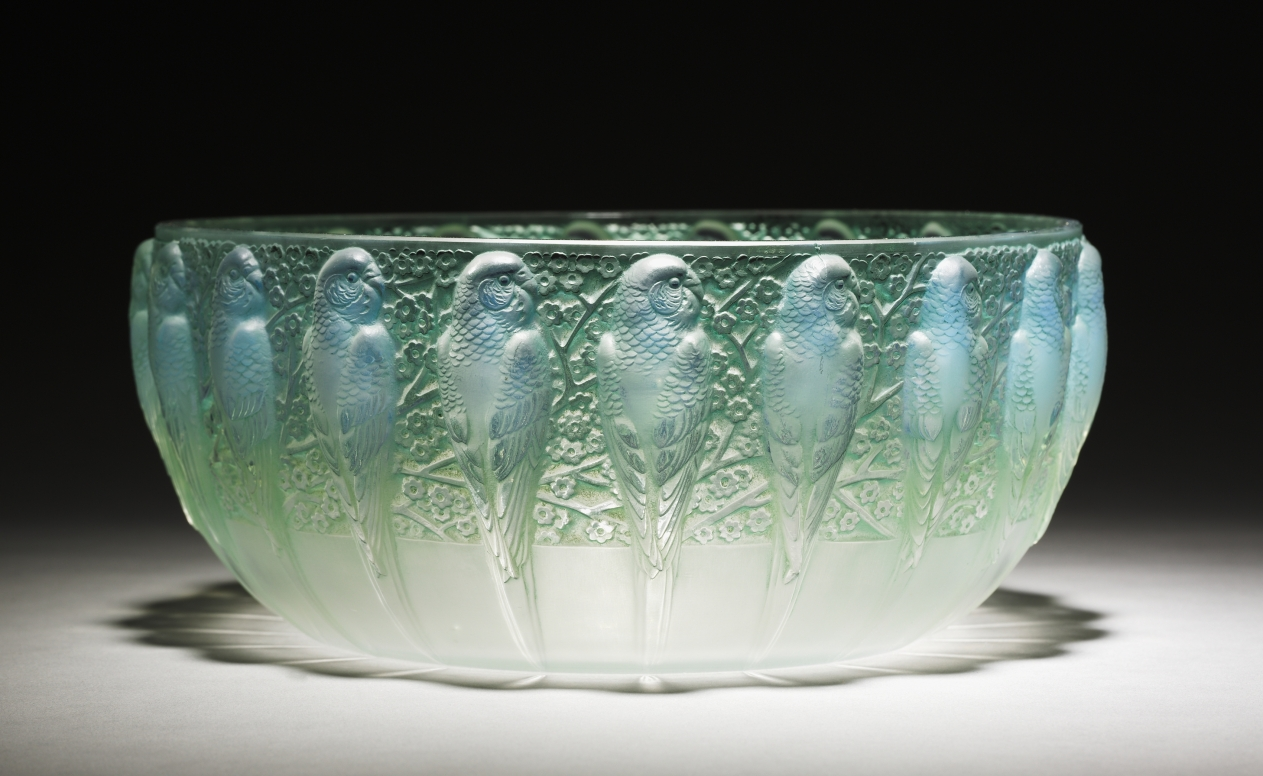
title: Parakeets (Perruches) Bowl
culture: France, 20th century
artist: René Lalique (French, 1860–1945)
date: 1931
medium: glass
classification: Glass